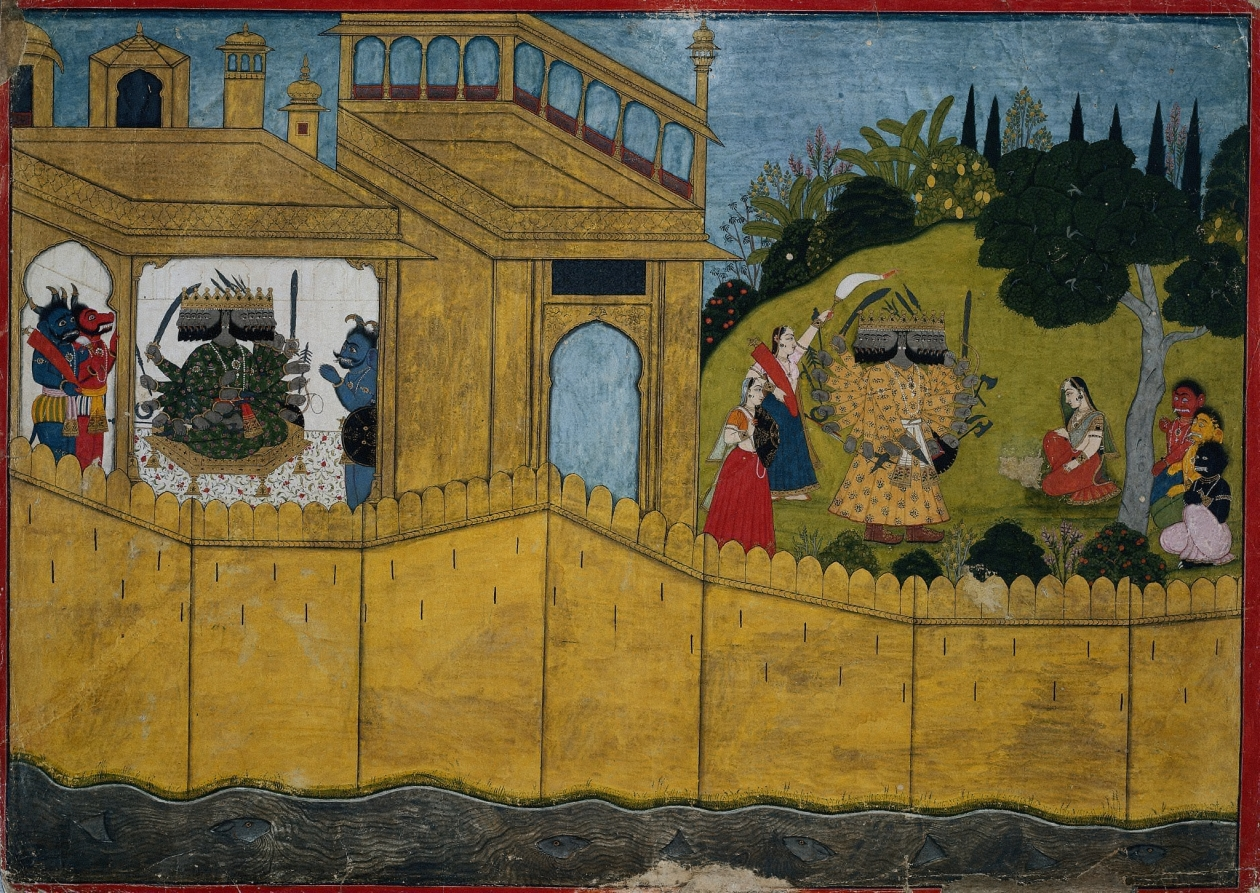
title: Ravana addresses Sita in the garden of Lanka, from Chapters 53 and 54 of the Aranya Kanda (Book of the Forest) of a Ramayana (Rama’s Journey)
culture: Northern India, Pahari kingdoms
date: c. 1725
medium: Gum tempera, gold, and silver on paper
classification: Painting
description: The viewer is cut off from Lanka by the surrounding sea and the city’s golden walls in this expansive composition probably intended for courtly display This choice of perspective cleverly emphasizes the captivity of the Sita, faithful wife of the hero Rama. She kneels beneath an ashoka tree, guarded by demonesses. The princess’s abductor, the 10-headed and 20-armed demon lord of Lanka, Ravana, appears twice in the image. In the palace, he consults his council of minions. At the right, he hears Sita’s refusal to marry him. Ravana neither harms her, nor sets her free.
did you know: Ravana’s wives take the forms of beautiful women and fearsome demonesses.